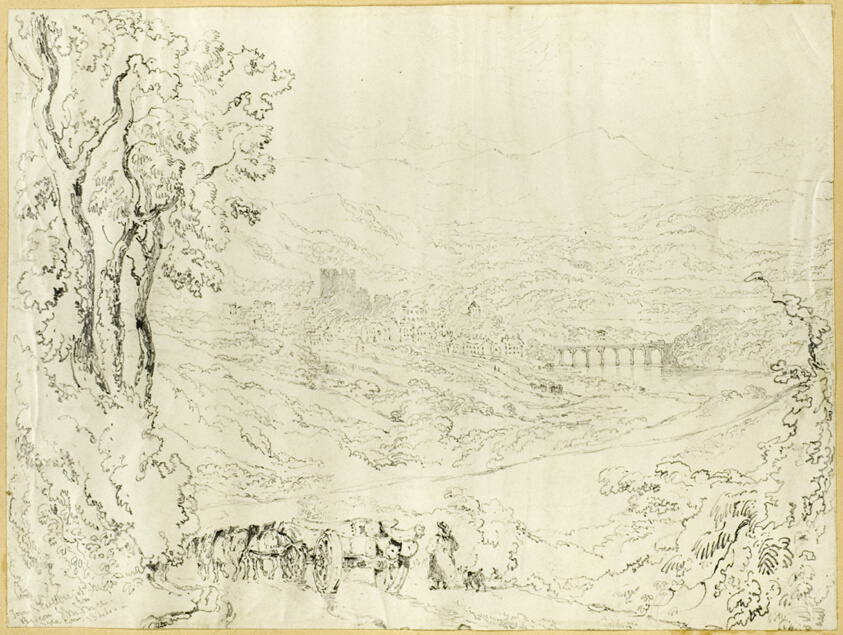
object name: Drawing and Watercolor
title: Town and Castle of Hay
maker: Joseph Murray Ince (English, 1806-1859)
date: 1844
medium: Graphite on pale gray wove paper, tipped onto tan wove paper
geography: England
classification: graphite; drawings (visual works); prints and drawing